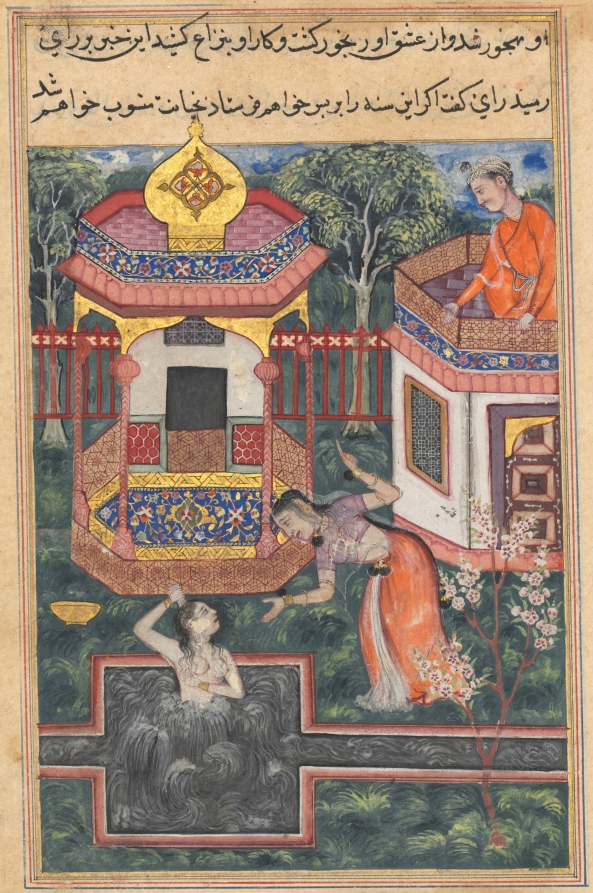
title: The son of the king of Babylon sees the Brahman transformed into a woman bathing and falls in love with her, from a Tuti-nama (Tales of a Parrot): Thirty-fifth Night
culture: Mughal India, court of Akbar (reigned 1556–1605)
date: c. 1560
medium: gum tempera, ink, and gold on paper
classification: Painting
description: One day the king’s son caught sight of a woman washing her hair and fell in love with her. She was actually a Brahmin, a Hindu priest, who had a magic pearl of transformation that allowed him to live in the women’s quarters with his lover, the princess. The princess gestures in alarm, as she realizes her brother has fallen for her lover. Another popular subject that we see in the Tuti-Nama and in later painting is women bathing in a pool. Women bathing also appear in Krishna sporting with the gopis, from the early Bhagavata Purana, CMA 1971.171. Note how the Mughal handling of water with gentle swirls differs from the concentric circles in Krishna sporting with the gopis.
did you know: The prince becomes so lovesick that he nearly dies.